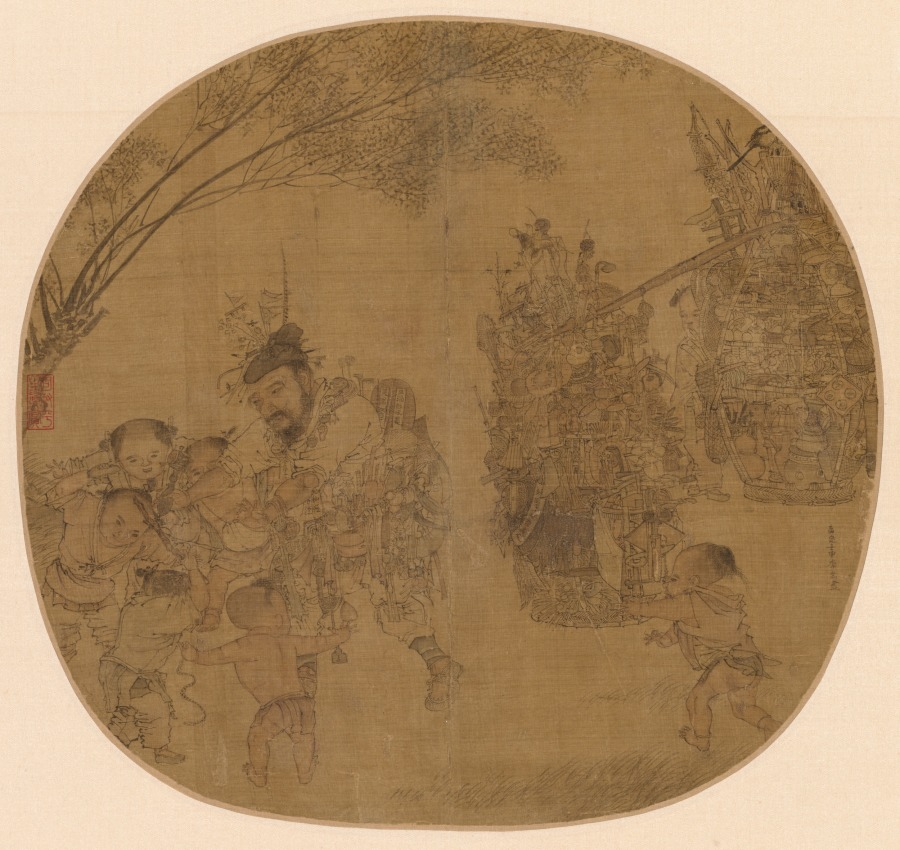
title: The Knickknack Peddler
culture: China, Southern Song dynasty (1127-1279)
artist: Li Song (Chinese, active c. 1190–c. 1230)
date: 1212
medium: Album leaf; ink and color on silk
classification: Painting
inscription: Artist's inscription: 嘉定壬申李嵩畫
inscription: 1 colophon and 4 seals: 1 colophon and 3 seals of Li Zuoxian 李佐賢 [1807–1876]; 1 seal unidentified.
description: The court artist Li Song from Hangzhou excelled in meticulous depictions of children, peddlers, and their various goods. Here, he captures a dramatic scene of children attacking a snake with a stick and stone. The peddler rushes toward the children, leaving his merchandise unattended. Painted during the reign of emperor Ningzong, the drama unfolding around vulnerable children may allude to Ningzong’s nine sons who died young, leaving him without a direct male descendant.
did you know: There is a skull, upside down, near the top of the left basket.